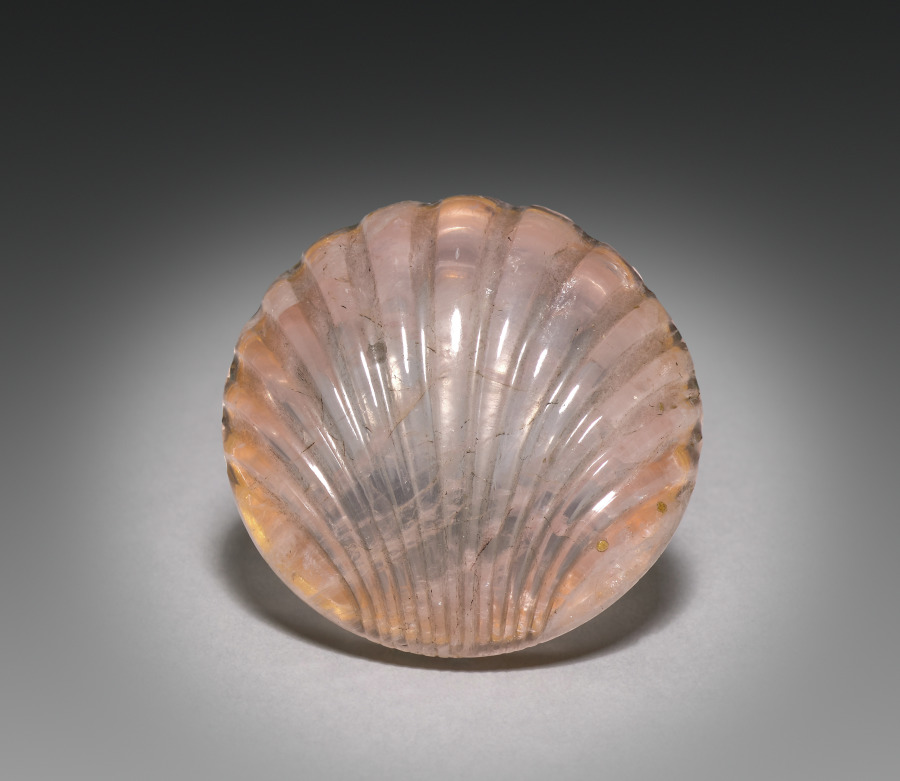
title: Shell-Shaped Box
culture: Italy (?), 19th century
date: late 1800s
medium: pink quartz, gold, enamel, diamonds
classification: Stone